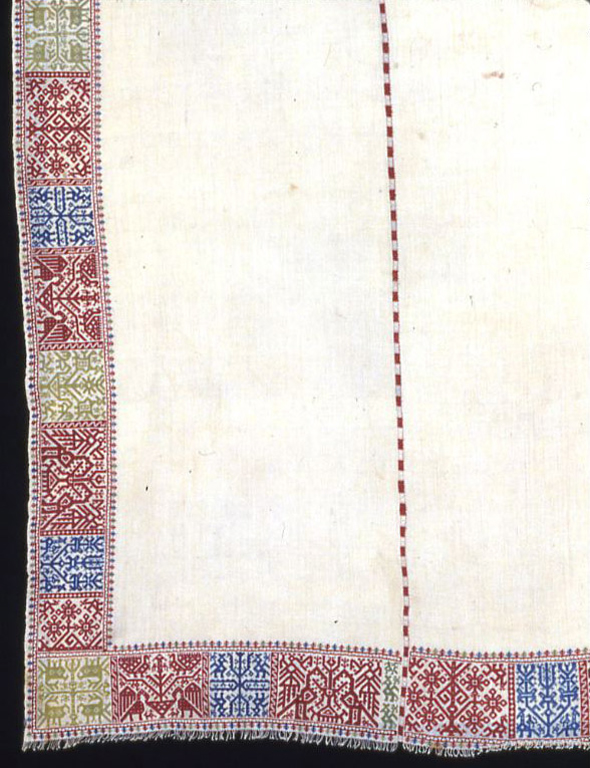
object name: Textile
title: Bedcover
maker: Greece, Ionian Islands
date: 1700/1900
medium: Linen, plain weave; pulled thread work embroidered with silk in darning and two-sided Italian cross stitches; joined with silk, needle-made inserts of knotted buttonhole stitches; edged with plied and knotted warp fringe; four loom widths joined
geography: Greece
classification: textile; needlework (visual works)